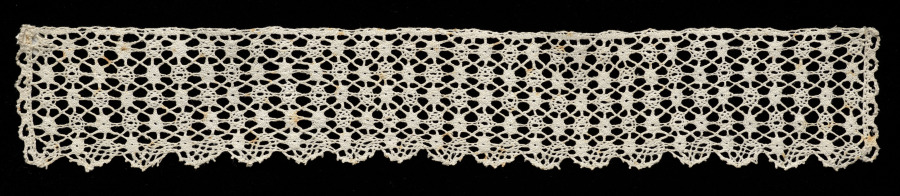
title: Lace Insertion and Edging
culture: Italy, Umbria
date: 1600s–1700s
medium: Bobbin lace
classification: Lace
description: The design motif of this piece of bobbin lace is called "piedi di gallina" (chicken's feet).